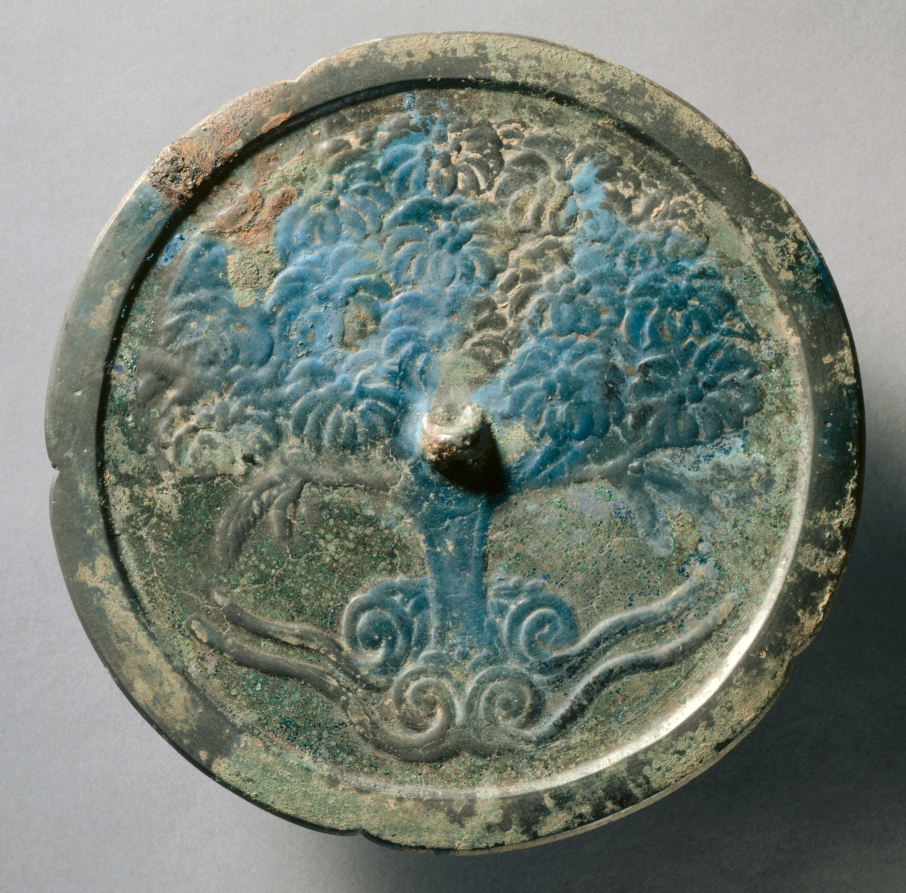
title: Lobed Mirror with Shaluo Tree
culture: China, Northern Song dynasty (960-1127)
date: mid 10th Century - mid 12th Century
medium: bronze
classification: Metalwork